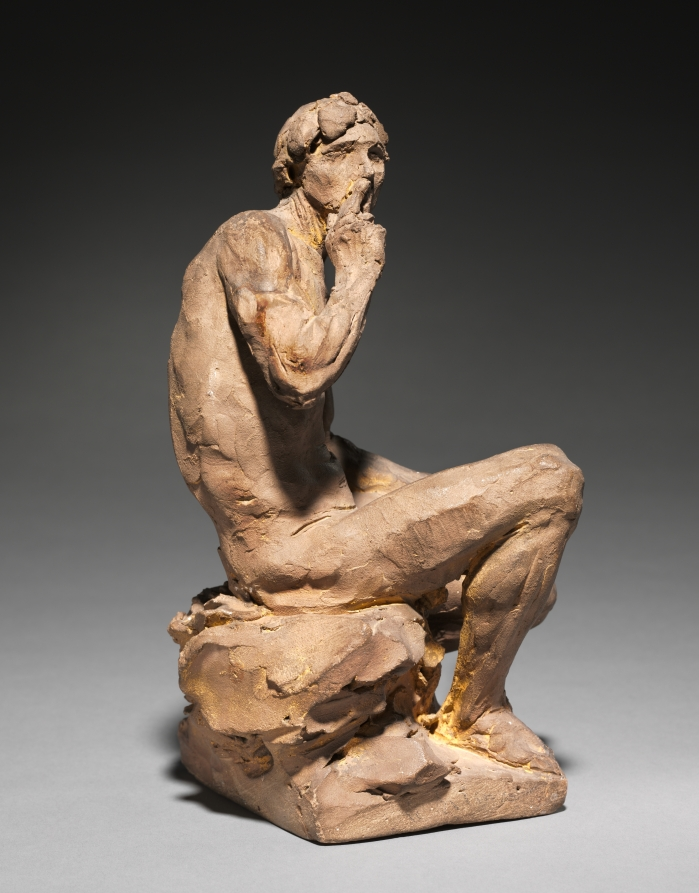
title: Study for "Silence"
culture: France, 18th century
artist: attributed to Louis-Philippe Mouchy (French, 1734–1801)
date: c. 1780–89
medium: terracotta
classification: Sculpture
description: When originally acquired this work was understood as a sketch for the "Citizen," a figure for a monument to King Louis XV in the French city of Rheims by Jean-Baptiste Pigalle. In that work the figure of the "Citizen" appears at the base, opposite an allegory of law, underneath a sculpture of Louis XV. The attribution was changed, however, after research made evident that the museum's sculpture precisely matches the iconography for "Silence." Moreover, the figure differs considerably from Pigalle's final figure of the "Citizen," throwing the attribution to Pigalle in question as well. The work is now believed to be by Pigalle's close follower, Mouchy, because of its similarity to a sculpture completed in 1789 for Madame Pompadour called Silence, which currently resides in the Luxembourg Palace in Paris.